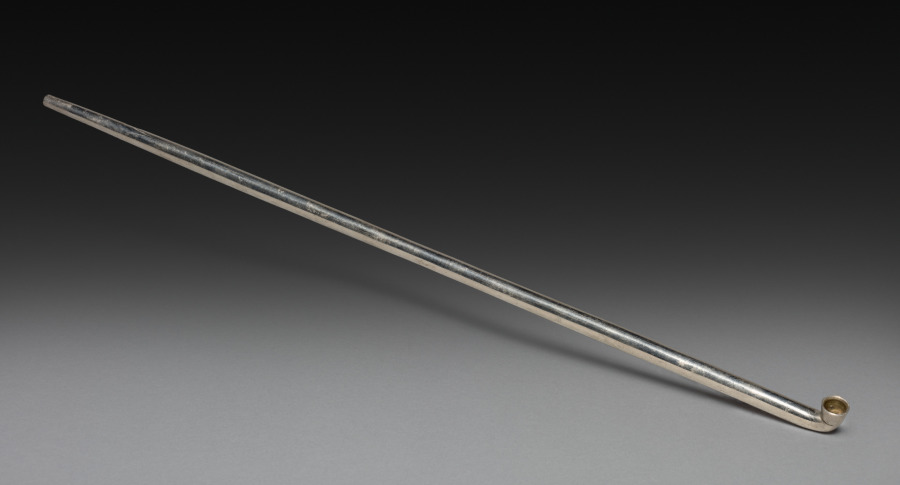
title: Tobacco Pipe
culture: Japan, Edo period (1615–1868) to Meiji period (1868–1912)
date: 1800s–early 1900s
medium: metal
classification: Miscellaneous